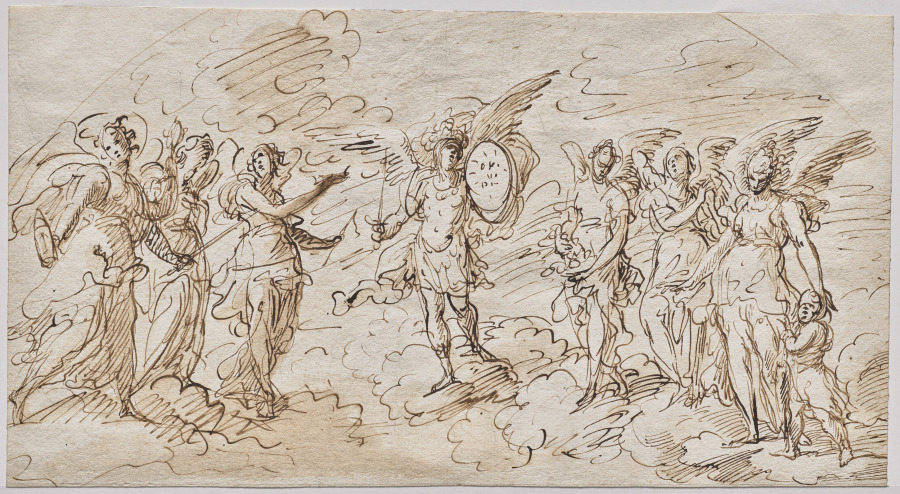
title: The Seven Archangels (recto)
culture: Italy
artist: Massimo Stanzione (Italian, 1585–1656)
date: c. 1620s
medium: Pen and brown ink, brown wash, traces of black chalk (recto)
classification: Drawing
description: Massimo Stanzione worked in the Spanish-held Kingdom of Naples, where, during the 17th century, painting was characterized by dramatic expression, emphatic naturalism, and intense chiaroscuro derived from the profound influence of Caravaggio (1571-1610). Stanzione, however, was known in the city as one of the main purveyors of a more classical style, a kind of antithesis to the passion and drama of such Neapolitan painters as Jusepe de Ribera. This drawing relates directly to a painting Stanzione made depicting the seven archangels at the Monasterio de la Descalzas Reales in Madrid. The iconography of the seven archangels was a regional focus of devotion in the Neapolitan kingdom, and in Spain, where the cult of the “Seven Angelic Princes” had been promoted by the 16th-century Sicilian friar, Antonio Del Duca (1491-1564).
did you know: The Archangel Michael is shown at the center of the composition, surrounded by six more archangels, from left to right, Gabriel, Uriel, Jehudiel, Barachiel, Selathiel, and Raphael.